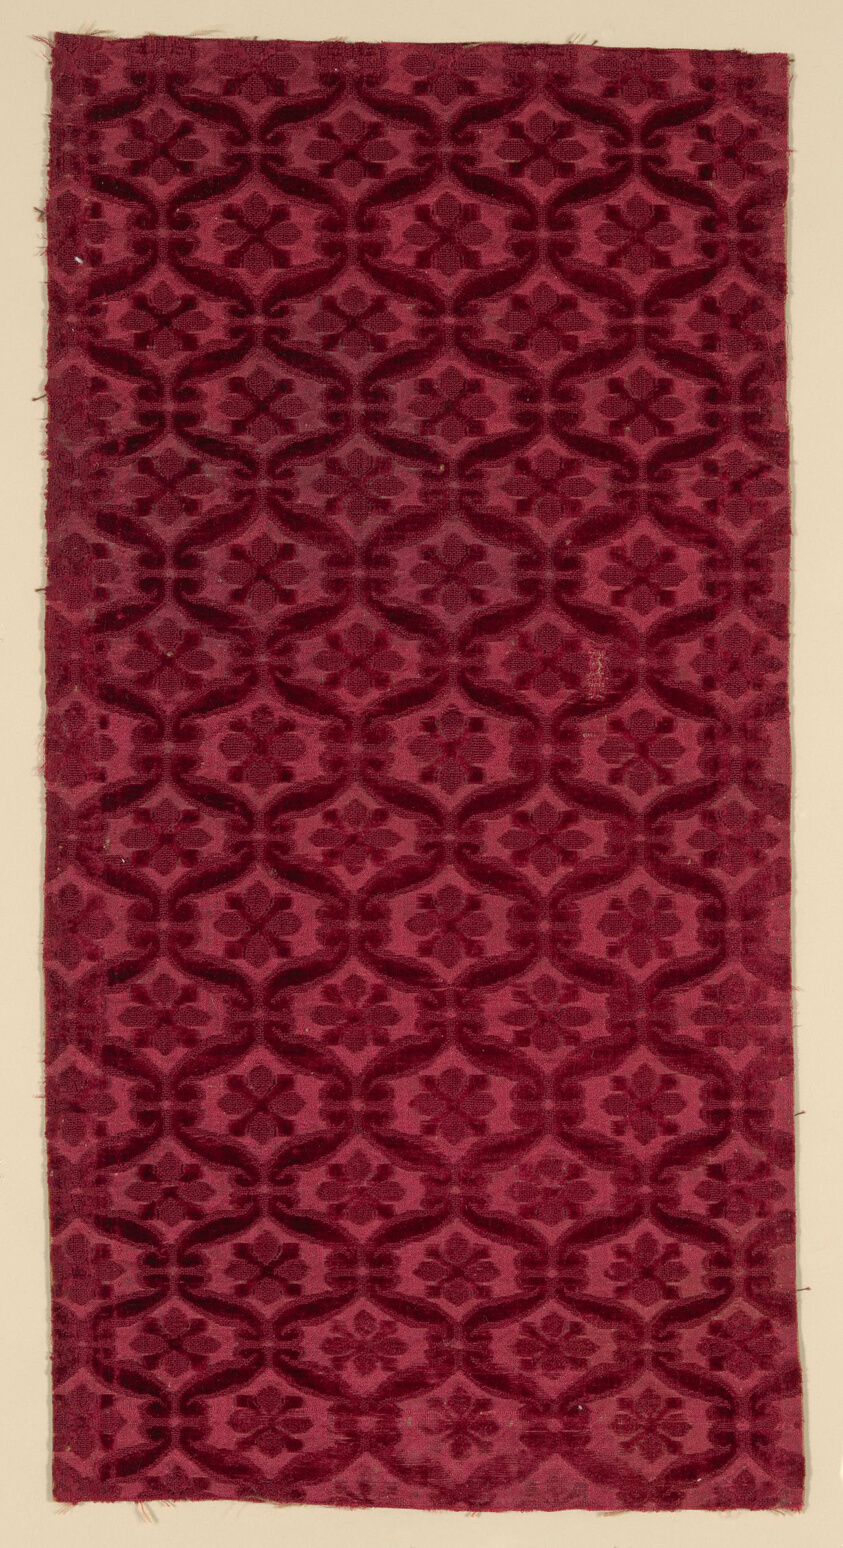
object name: Textile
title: Fragment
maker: Italy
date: c. 1600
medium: Silk, warp-float faced satin weave with supplementary pile warps forming cut and uncut, voided velvet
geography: Italy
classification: textile; weaving - velvet; weaving